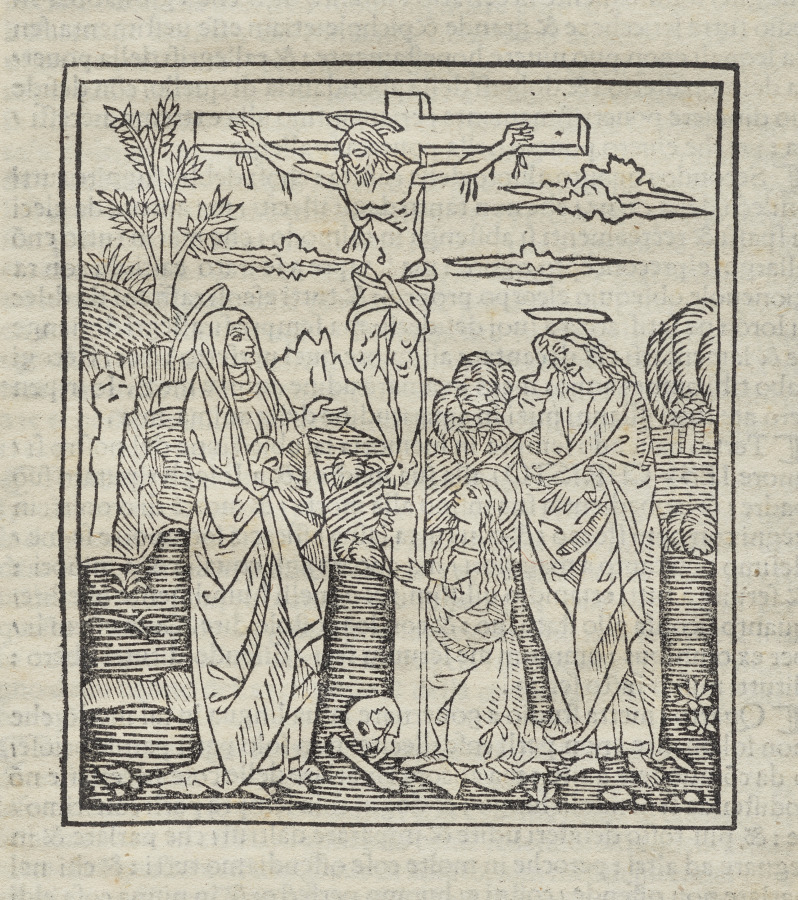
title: Crucifixion; published in Operette: Regola a tutti religiosi, Trattato del sacramento e dei misteri della Messa, Ragola del ben vivere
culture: Italy, Florence, late 15th Century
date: c. 1499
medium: woodcut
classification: Print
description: Girolamo Savonarola was a Dominican friar who, in 1481, went to Florence to preach against the immorality at the court of Lorenzo de Medici and the corruption of the clergy. As prior of the monastery of San Marco, he convinced the public to cast objects of luxury into huge bonfires. Savonarola became increasingly fanatical and obstinate, finally coming into conflict with Pope Alexander VI. The friar was excommunicated and hanged in 1498.